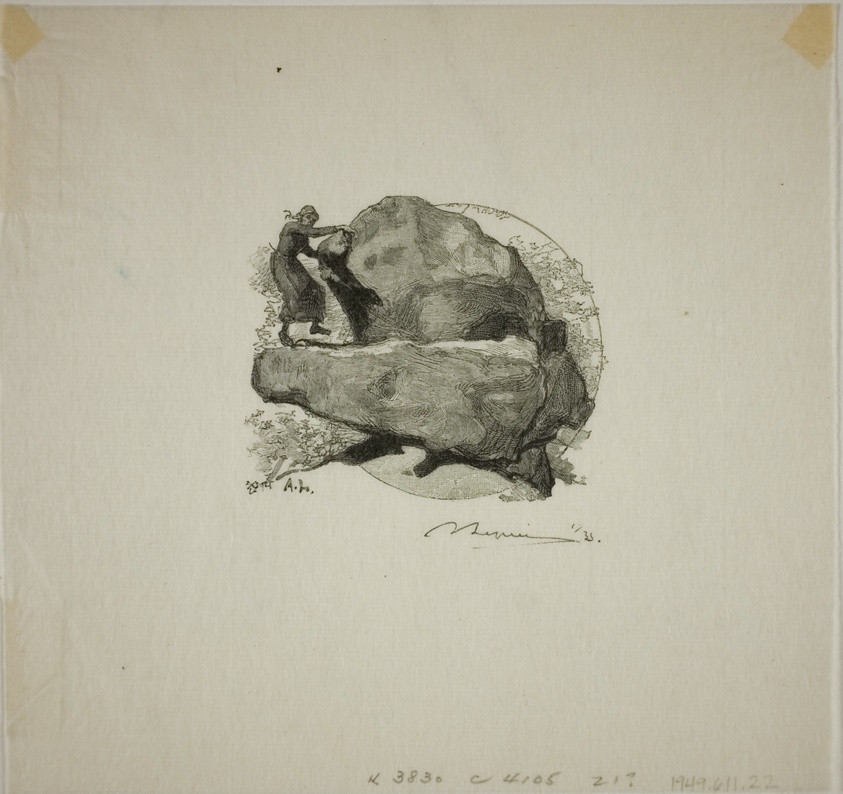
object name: Print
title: The Trembling Rock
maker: Louis Auguste Lepère (French, 1849-1918); published by A. Desmoulins (French, active c. 1908-1910)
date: published 1908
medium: Wood engraving in black on cream laid Japanese paper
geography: France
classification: wood engraving; print; prints and drawing